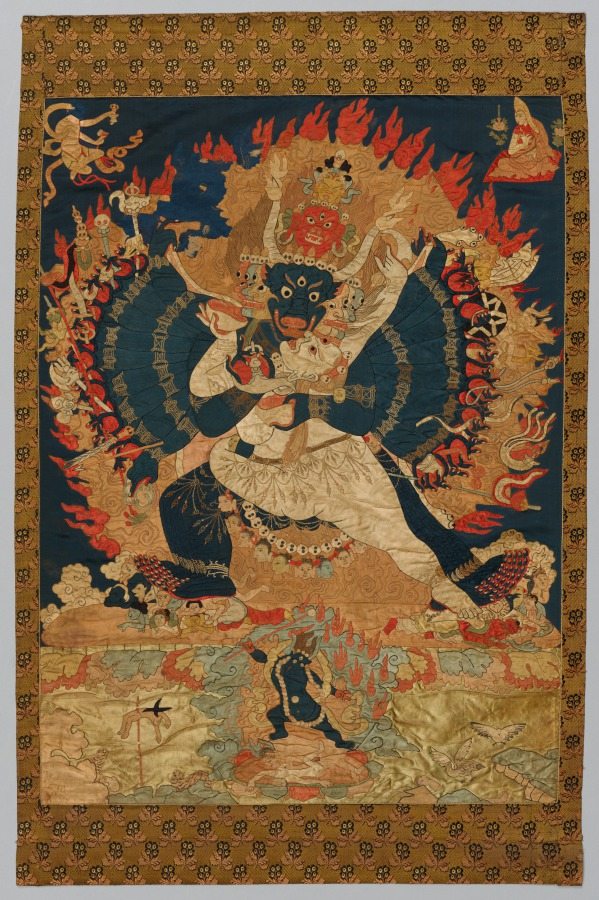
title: Yamantaka Vajrabhairava and consort Vajravetali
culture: Tibet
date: 1700s–1800s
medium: paper, metallic thread, hair, ink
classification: Embroidery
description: Practitioners meditate on this powerful image to conquer fear of death. As a manifestation of the bodhisattva of wisdom, Manjushri, whose gold head is at the apex of his nine heads, Yamantaka Vajrabhairava demonstrates that wisdom conquers fear and, ultimately, overcomes death itself by leading to enlightenment. With nine heads, 34 hands, and 16 legs, he surpasses the powers of Yama, god of death. Yama, the blue figure with buffalo head below, has only two arms, and he wields his skull-topped scepter at impaled and decapitated bodies, judging their souls be sent to hell.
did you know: His buffalo head connects him with the vehicle ridden by Yama, god of death.